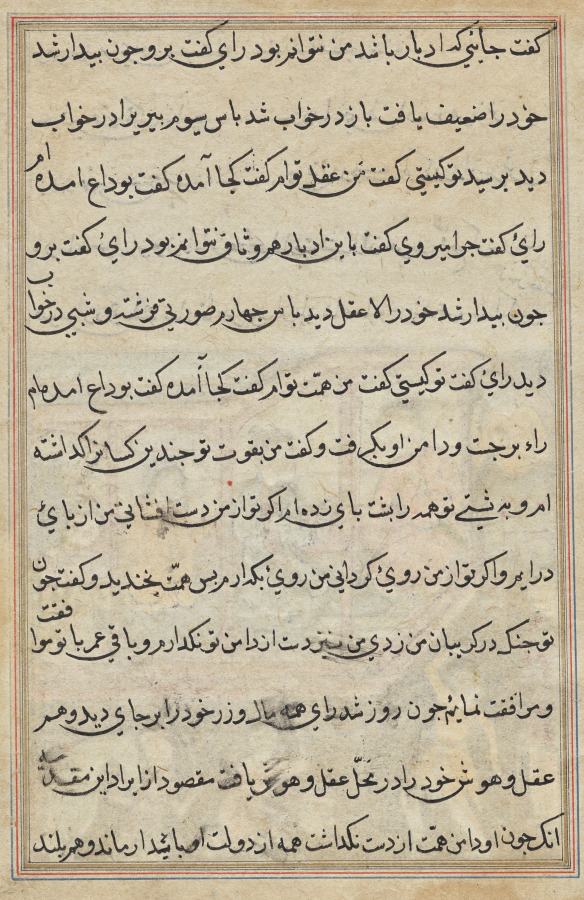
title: Page from Tales of a Parrot (Tuti-nama): text page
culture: Mughal India, court of Akbar (reigned 1556–1605)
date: c. 1560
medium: gum tempera, ink, and gold on paper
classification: Painting